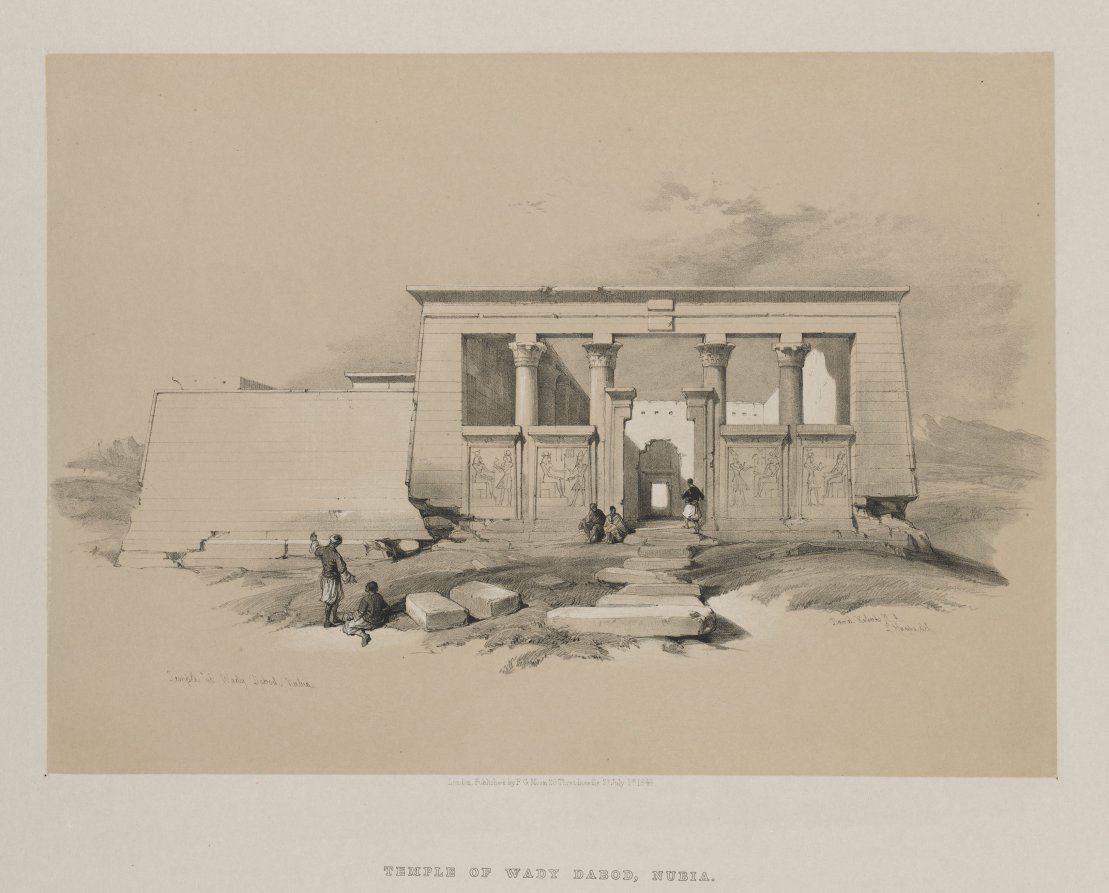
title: Egypt and Nubia, Volume II: Temple at Wady Dabod, Nubia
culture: England, 19th century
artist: Louis Haghe (British, 1806–1885)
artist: after David Roberts (Scottish, 1796–1864)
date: 1848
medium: color lithograph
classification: Print